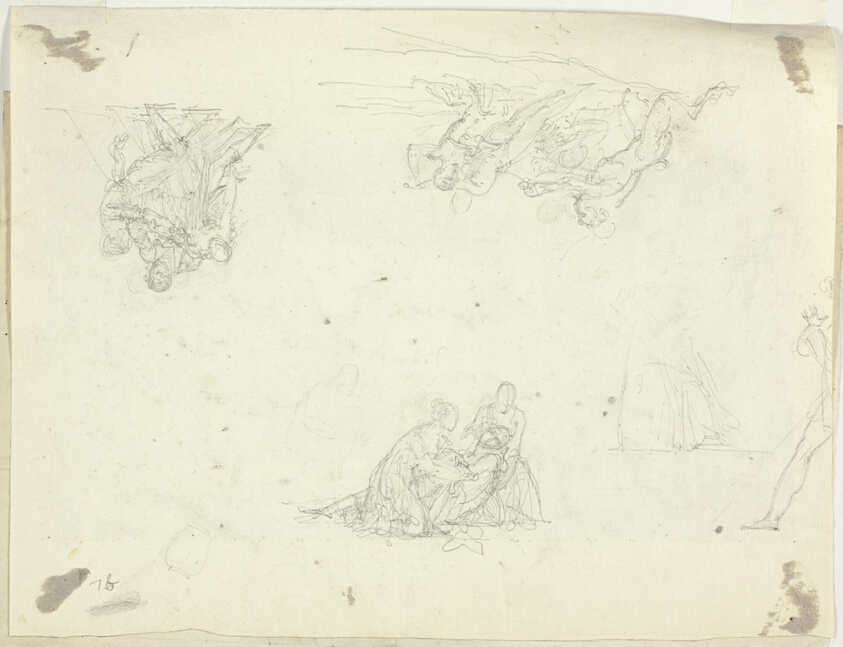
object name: Drawing and Watercolor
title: Sheet of Sketches: Groups of Figures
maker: Pierre Antoine Mongin (French, 1761-1827)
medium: Graphite on cream laid paper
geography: France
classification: drawings (visual works); prints and drawing